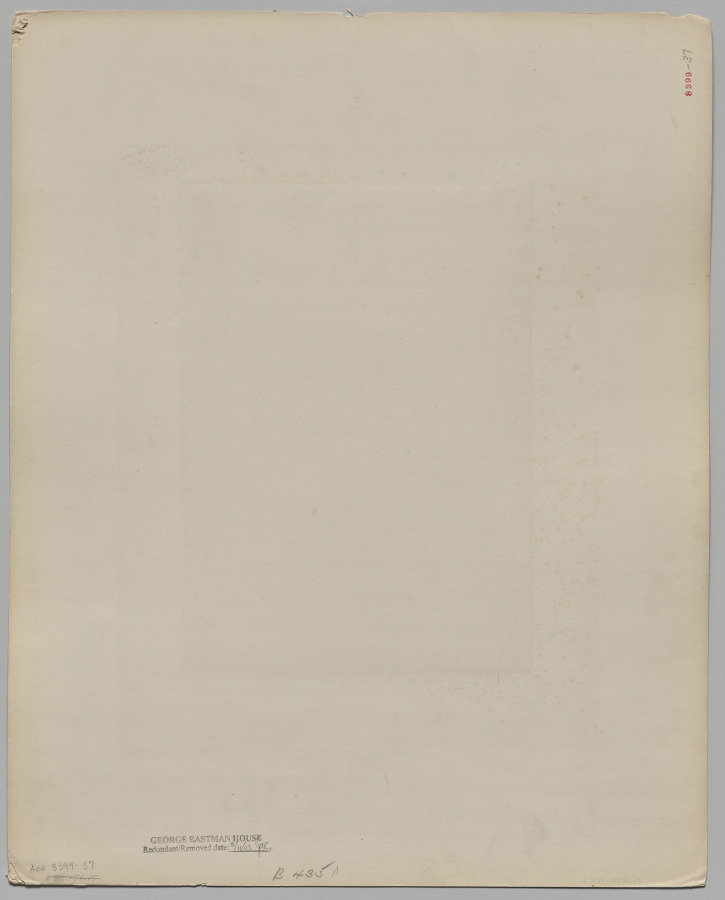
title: Canon of Kanab Wash, Looking South, Colorado River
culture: America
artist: William H. Bell (American, 1830–1910)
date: 1872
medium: Albumen print from glass plate negative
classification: Photograph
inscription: Imprinted in black ink on recto, middle center: "WAR DEPARTMENT (seal of eagle and laurels)"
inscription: Imprinted in black ink on recto, top margin: "Explorations in Nevada and Arizona"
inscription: Imprinted in black ink on recto, top margin: "Expedition of 1872 Lieut. Geo. M. Wheeler, Com'd'g."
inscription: Imprinted in image: "W. Bell, Phot"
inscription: Imprinted on recto, center: "COLORADO RIVER SERIES./CAÑON OF KANAB WASH, LOOKING SOUTH./No. 21."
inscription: Stamped in red ink on verso: "8399-37 (written in pencil)"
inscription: Stamped in black ink on verso: "GEORGE EASTMAN HOUSE/Redundant/Removed date: 2/11/03 JR (in pencil)"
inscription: Written in pencil on verso: "Acc 8399-37/x 80: 151:15"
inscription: Written in pencil on verso: "B 435 A"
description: William H. Bell was the staff photographer for the government-sponsored Wheeler expedition of 1871–73, whose mission was to survey and produce topographic maps of the Southwestern United States. In 1872, he recorded rivers, canyons, and landscapes in Arizona and Utah including Kanab Creek canyon in the Grand Canyon. For a westward view of the same location, see Bell’s Grand Cañon, Colorado River, Mouth of Kanab Wash, Looking West (1997.130).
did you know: Kanab is an anglicization of the Southern Paiute word for “willow.”